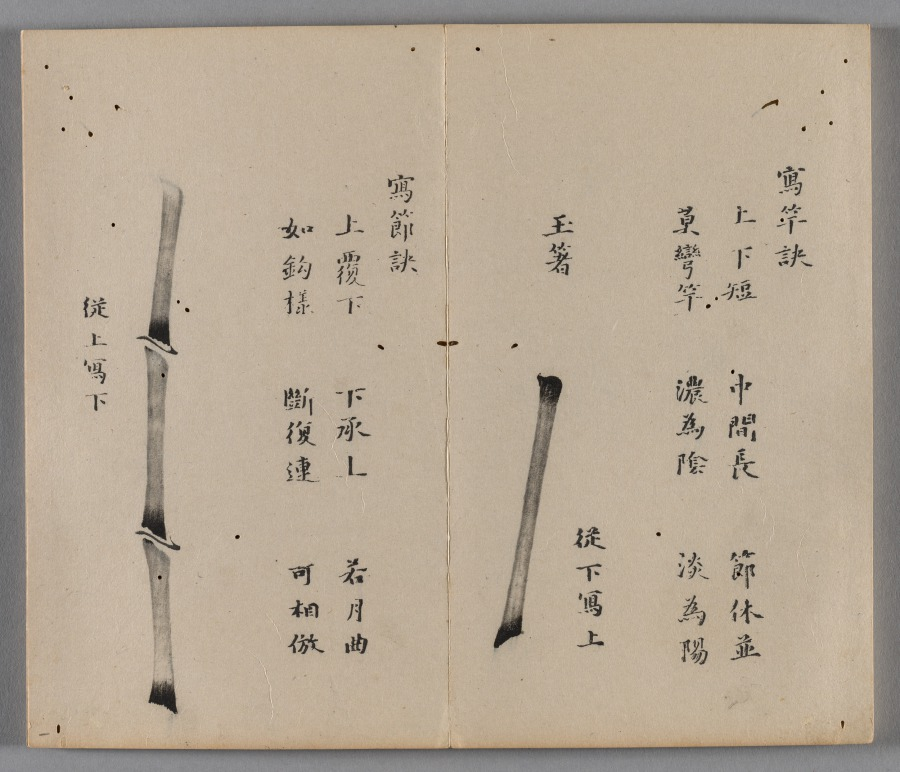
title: Ten Bamboo Studio Painting and Calligraphy Handbook (Shizhuzhai shuhua pu): Bamboo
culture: China, Qing dynasty (1644-1911)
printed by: Hu Zhengyan (Chinese, c. 1584–1674)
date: 1633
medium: Woodblock-printed book; ink and colors on paper; first edition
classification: Print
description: Color printing reached a level of perfection in the early 1600s, as seen in this Ten Bamboo Studio Collection of Calligraphy and Painting and the Mustard Seed Garden Manual of Painting (printed 1679 and 1701). The painterly quality, precision in registering (aligning) the woodblocks, and harmonious colors made them the most successful color print editions in Chinese history. Both editions were printed and compiled in Nanjing, spread nationwide, and had a great impact on the arts in Japan and Korea.